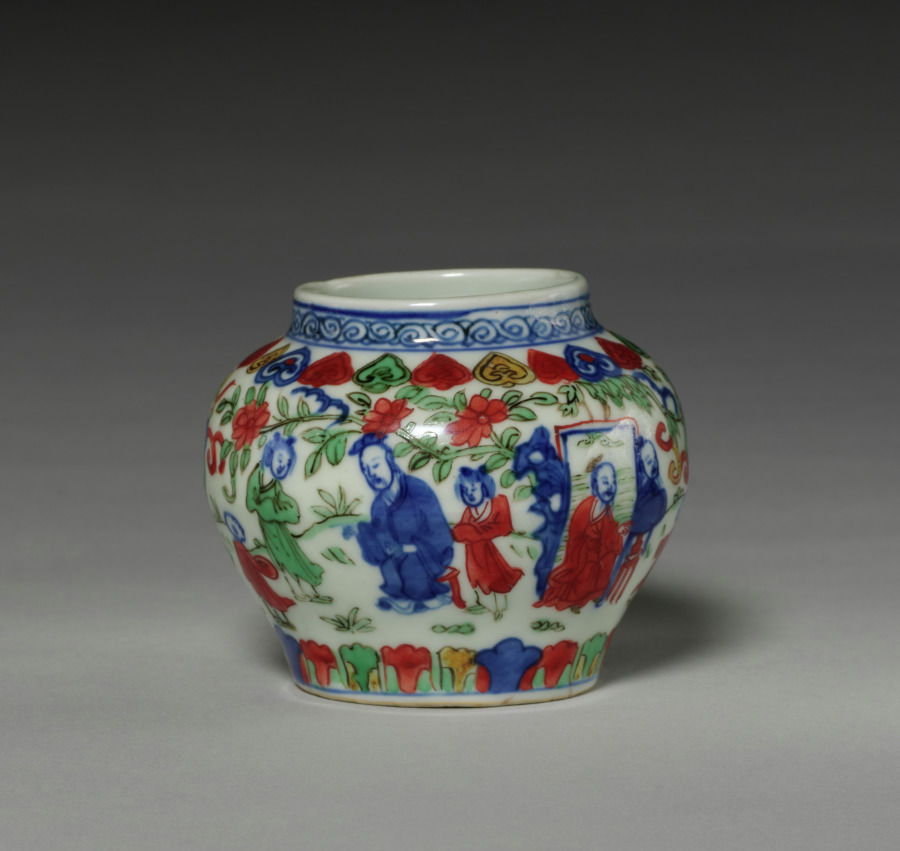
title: Covered Jar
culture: China, Jiangxi province, Jingdezhen kilns, Ming dynasty (1368-1644), Wanli reign (1573-1620)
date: 1573–1620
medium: porcelain with blue underglaze decoration and overglaze enamels in red, green, and yellow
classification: Ceramic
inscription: 大明萬曆年製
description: In the Ming (1368–1644) and Qing (1644–1911) dynasties, luxury items became more affordable to larger parts of the society, including women, merchants, and literati in non-official positions. Imperial patronage and a growing urban population encouraged consumption of luxury goods and local craftmanship. This covered porcelain jar has blue underglaze and overglaze in red, green, and blue enamels. It shows Ming dynasty advancements in porcelain decoration and the creative mind of the talented artisans who made it.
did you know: This jar is painted with 16 figures of all ages enjoying a garden setting.